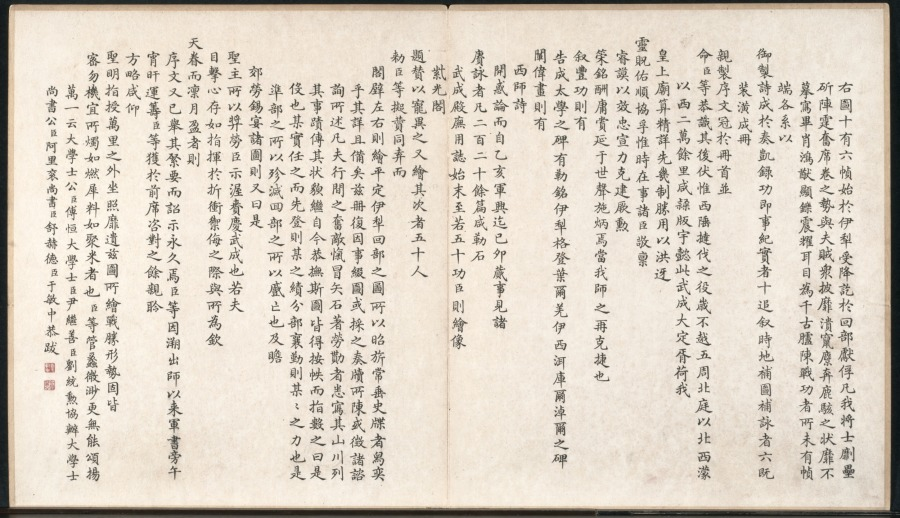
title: Battle Scenes of the Quelling of Rebellions in the Western Regions, with Imperial Poems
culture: China, Qing dynasty (1644–1911), Qianlong reign (1736–95)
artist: Giuseppe Castiglione (Italian, 1688–1766)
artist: Jean Damascene Sallusti (Italian, d. 1781)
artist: Jean Denis Attiret (French, 1702–1768)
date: c. 1765–74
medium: Etchings, mounted in album form, 16 leaves plus two additional leaves of inscriptions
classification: Print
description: This set of etchings was commissioned by Emperor Qianlong to record in pictorial terms the courage of his generals and soldiers in quelling the rebellions in the Western Regions. Qianlong added his own poem to each of the etchings, indicating his appreciation and pride in this demonstration of military might. "Western Regions" refers to the present-day Xingjiang province, often described in Western writing as "Central Asia."